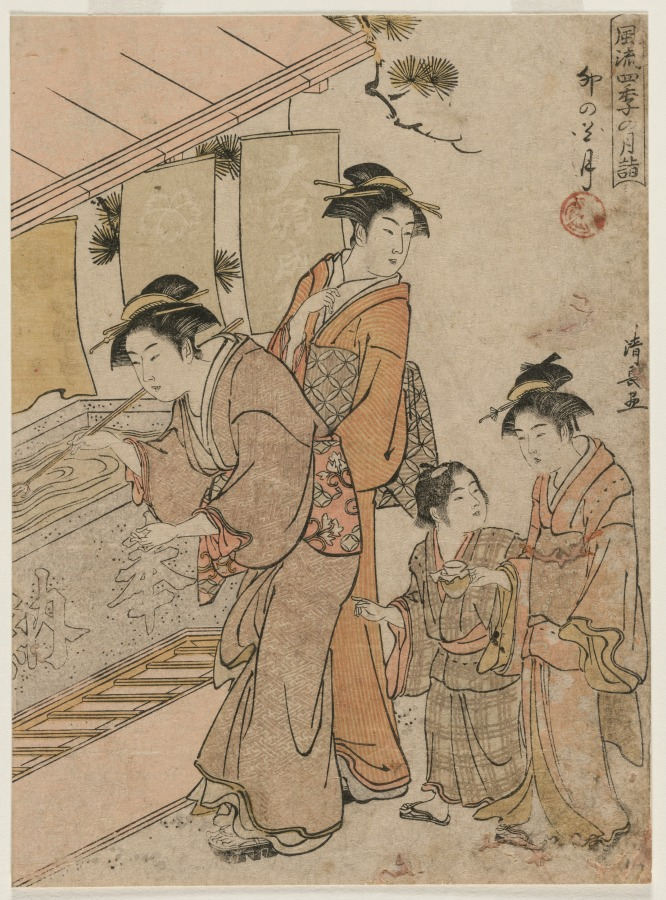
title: The Fourth Month (from the series Fashionable Monthly Visits to Temples in the Four Seasons)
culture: Japan, Edo period (1615–1868)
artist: Torii Kiyonaga (Japanese, 1752–1815)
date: 1784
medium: color woodblock print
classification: Print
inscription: Signature: Kiyonaga ga Publisher: Izumiya Ichibei ? (Izumiya)